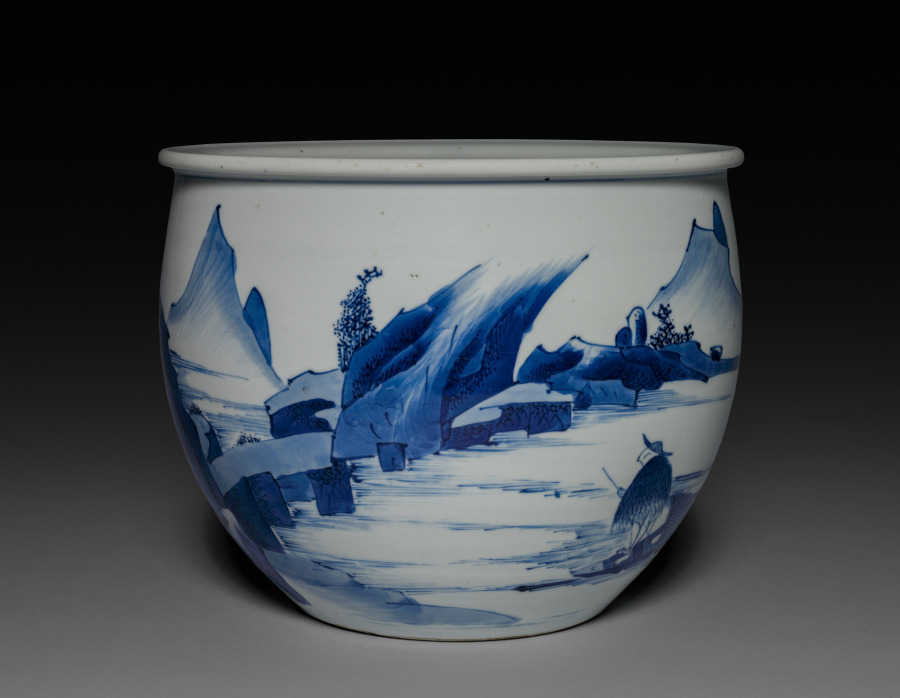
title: Pot with Landscape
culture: China, Jiangxi province, Jingdezhen kilns, Qing dynasty (1644-1911), Kangxi reign (1662-1722)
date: 1662–1722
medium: porcelain with underglaze blue decoration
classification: Ceramic